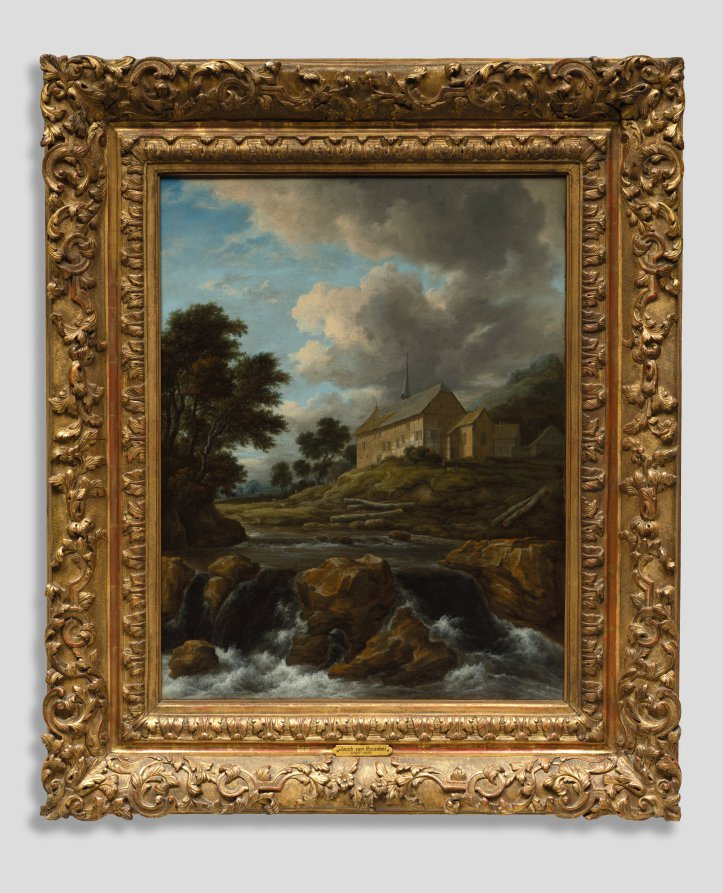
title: Landscape with a Church by a Torrent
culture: Netherlands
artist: Jacob van Ruisdael (Dutch, 1628/29–1682)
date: c. 1670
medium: oil on canvas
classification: Painting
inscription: Signed lower right: JvRuisdael [JvR in monogram]"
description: It is not known if Ruisdael considered his paintings to be social or moral commentary, for no documents from his lifetime indicate how the artist or his patrons interpreted the works. But in this painting dangerous rapids block access to the chapel, and severed logs litter the middleground, hinting at life’s transience and the challenge to reach salvation.